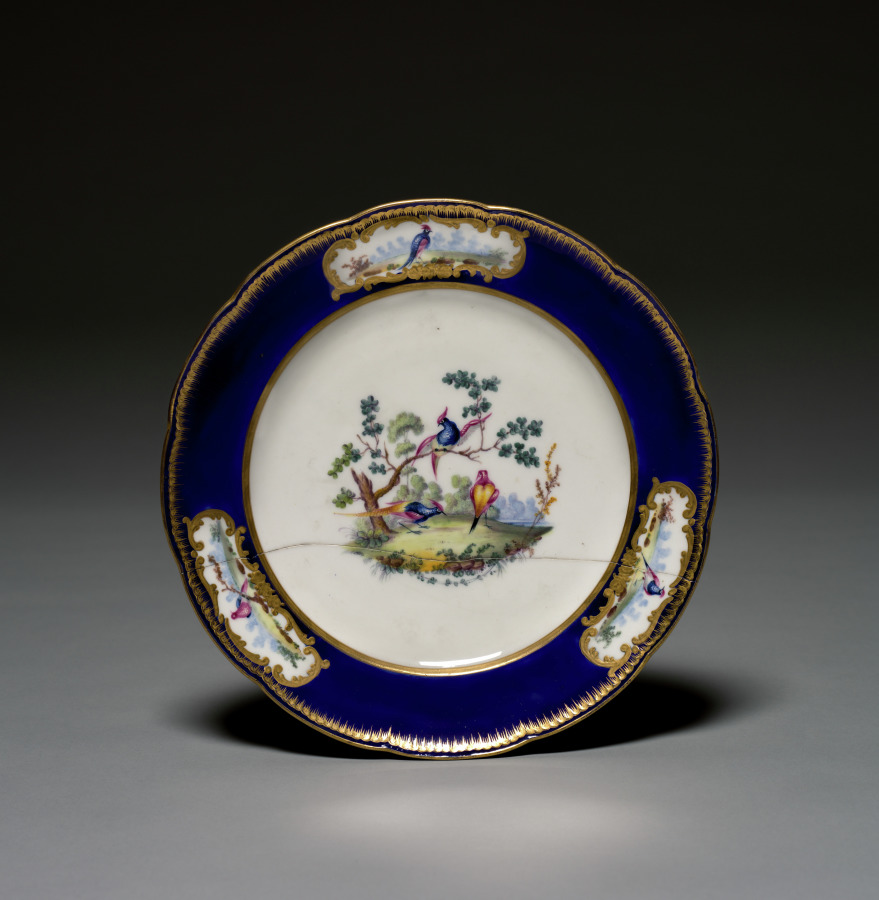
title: Plate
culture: France, Sèvres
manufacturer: Sèvres Porcelain Factory (French, est. 1756)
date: 1771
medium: soft-paste porcelain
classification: Ceramic